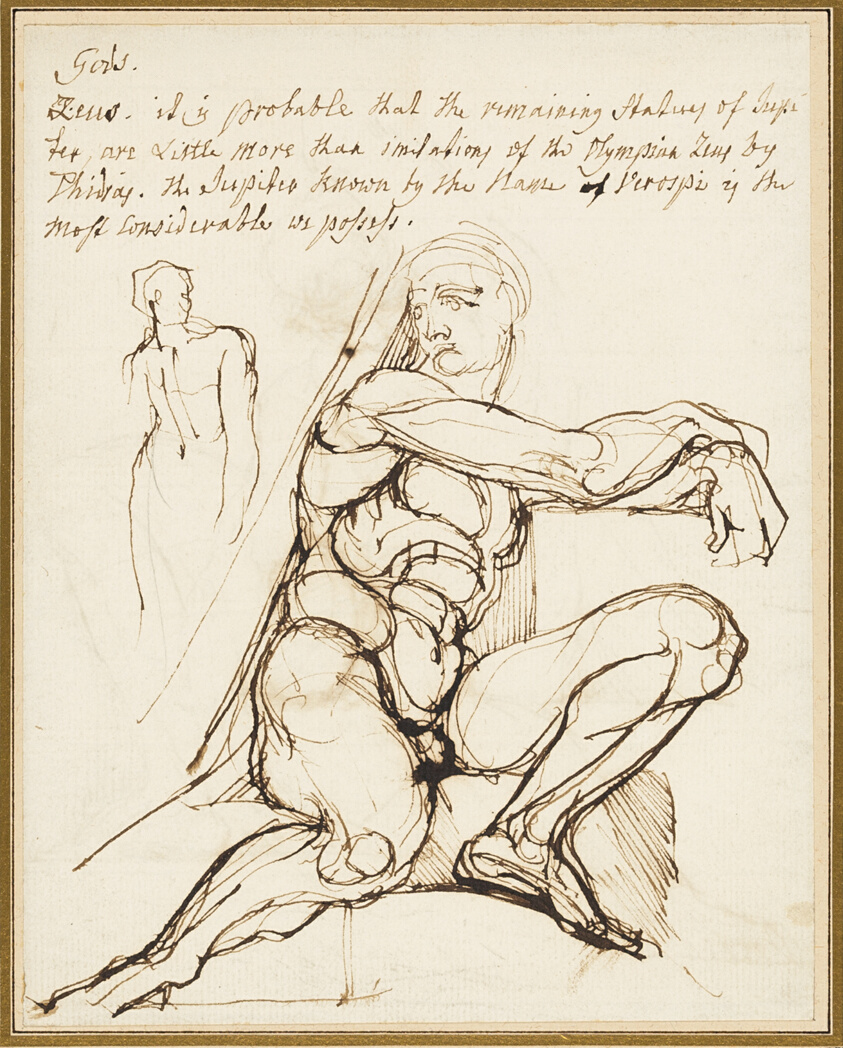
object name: Drawing and Watercolor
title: Study of Ignudo in Sistine Chapel, Rome (recto); Paraphrase of the Ignudo Seated to Upper Right of Prophet Jeremiah in Chapel, Rome (verso)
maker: Henry Fuseli (Swiss, active in England, 1741-1825); after Michelangelo Buonarroti (Italian, 1475-1564)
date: c. 1800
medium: Pen and brown ink (recto and verso) on ivory laid paper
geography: England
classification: pen and ink drawings; drawings (visual works); prints and drawing; paper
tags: zigzags